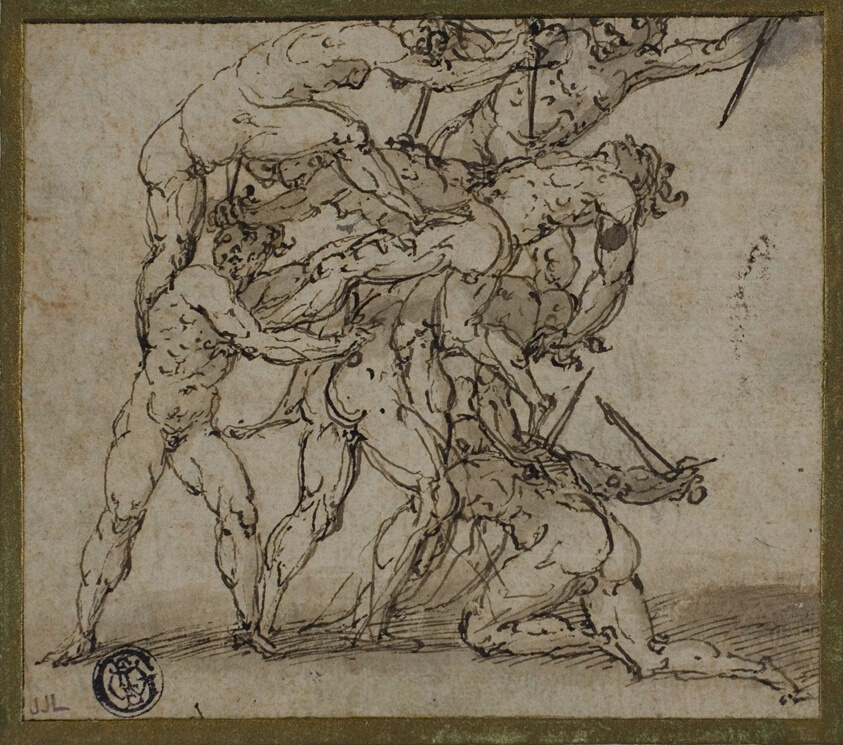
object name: Drawing and Watercolor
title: Male Nudes Locked in Combat with Daggers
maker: Unknown Artist; Italian, late 16th century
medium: Pen and brown ink, with brush and brown wash, on buff laid paper, laid down on cream laid card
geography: Italy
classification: ink with wash; drawings (visual works); prints and drawing